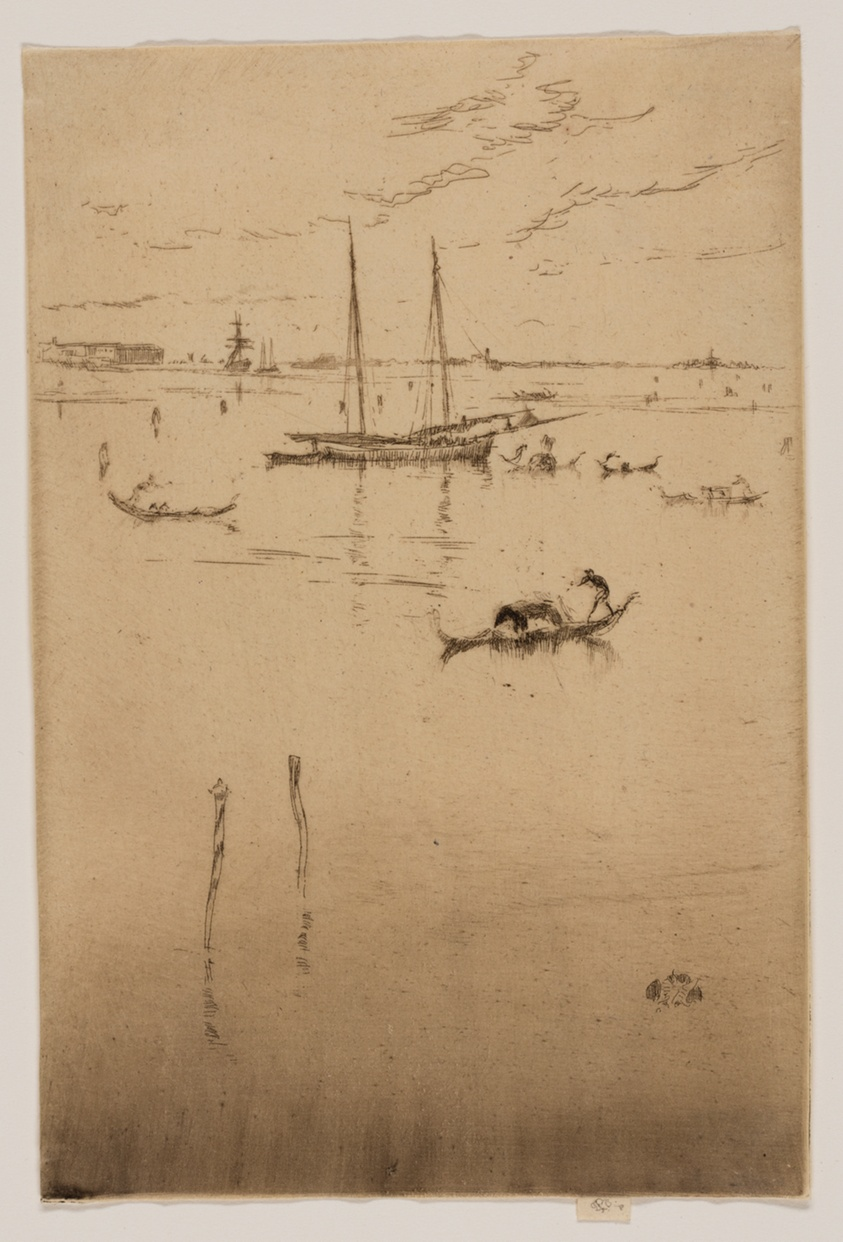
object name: Print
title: The Little Lagoon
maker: James McNeill Whistler (American, 1834-1903)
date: 1879/80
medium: Etching and drypoint with foul biting in black ink on cream paper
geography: United States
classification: etching; foul biting; print; prints and drawing; drypoint; paper